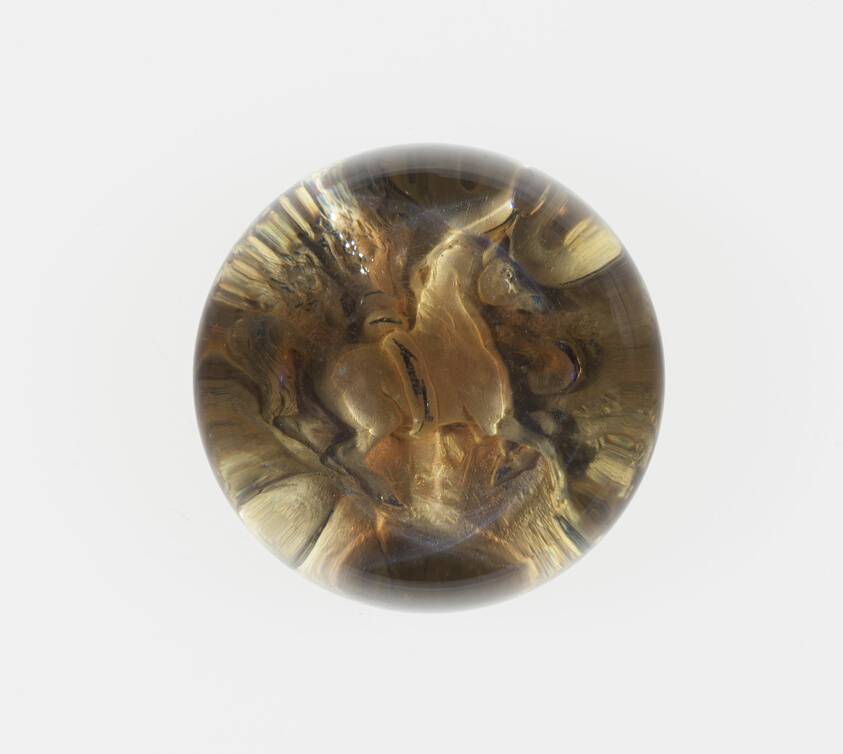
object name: Glass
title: Paperweight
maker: European, possibly English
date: c. 1848–60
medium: Glass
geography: England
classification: paperweight; glass